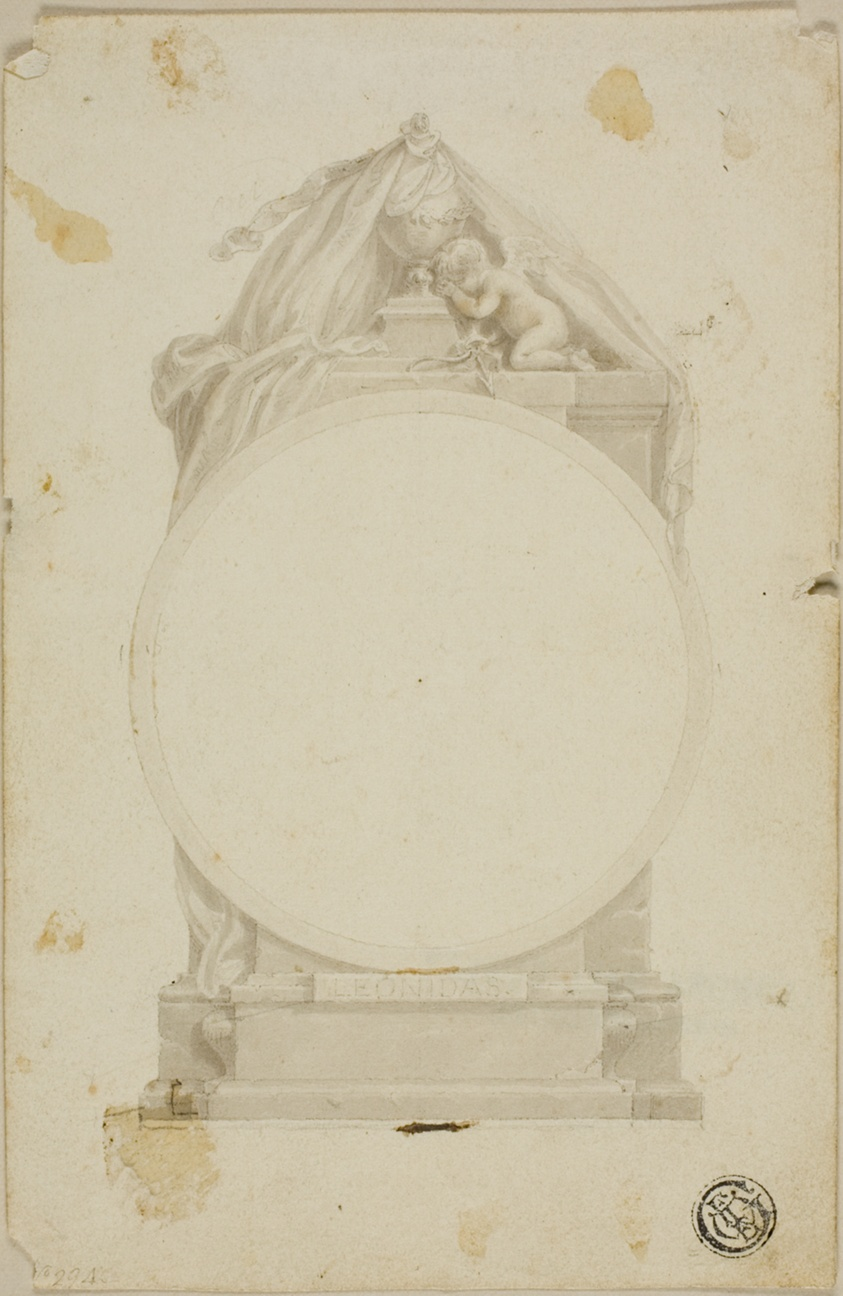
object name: Drawing and Watercolor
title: Funerary Monument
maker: Possibly Thomas Stothard (English, 1755-1834); or Richard Cosway, R.A. (English, 1742-1821); or Edward Francis Burney (English, 1760-1848); or Charles Alfred Stothard (English, 1786-1821)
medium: Pen and gray ink with brush and gray wash, over graphite, on cream wove paper, tipped onto board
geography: England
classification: ink or chalk wash; drawings (visual works); prints and drawing